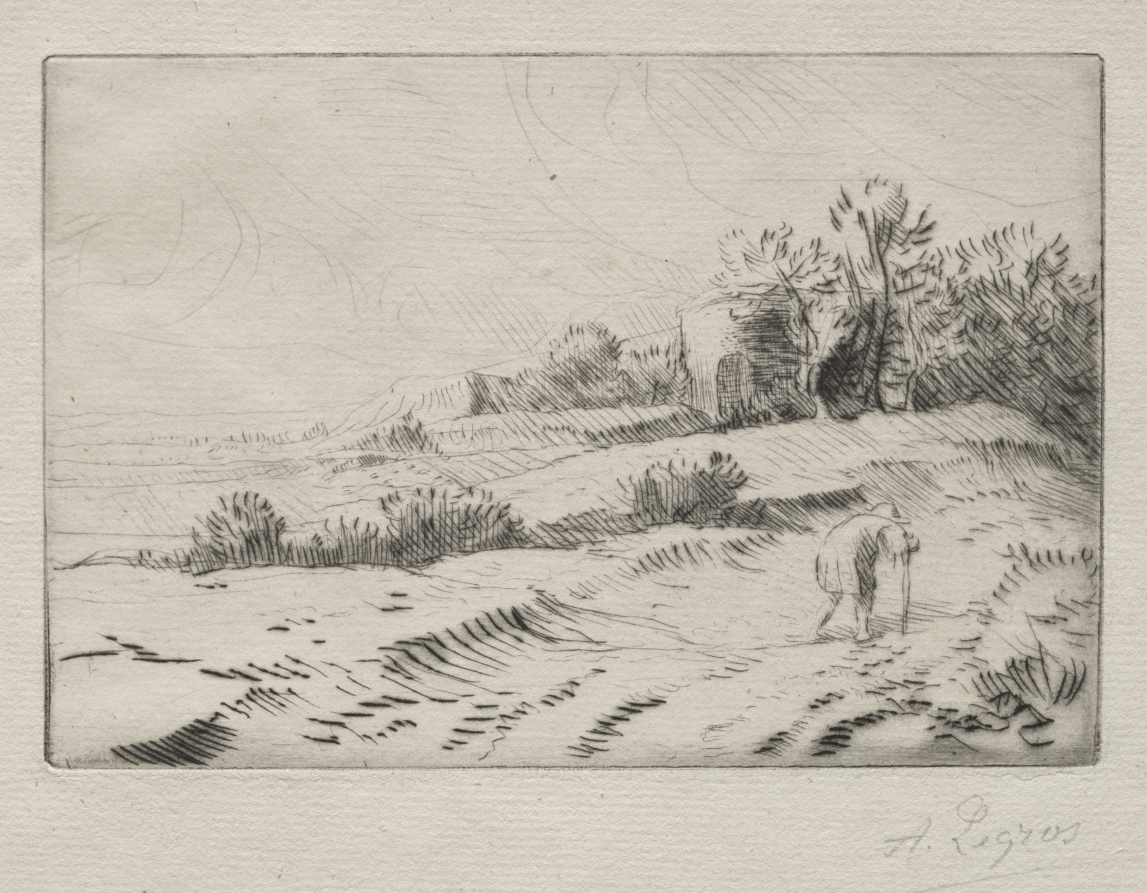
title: The Tower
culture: France, 19th-20th century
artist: Alphonse Legros (French, 1837–1911)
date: c. 1857–1911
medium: etching and drypoint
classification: Print